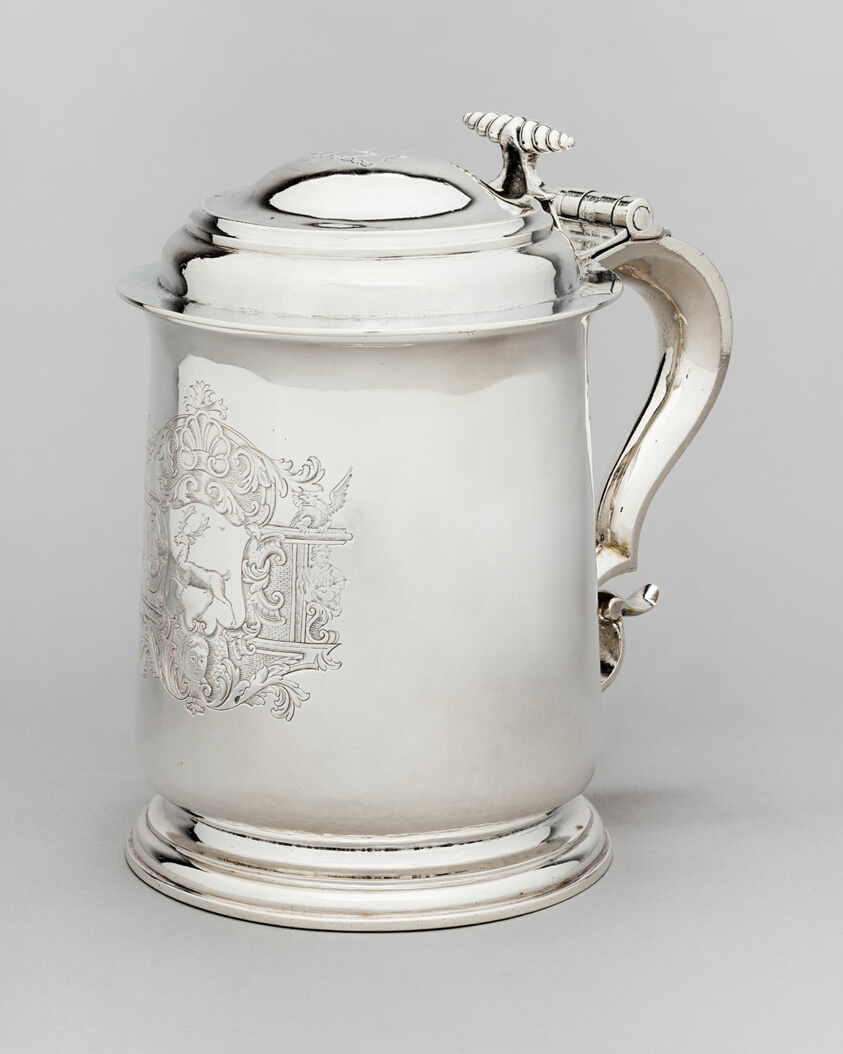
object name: Metalwork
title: Tankard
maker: Simeon Soumaine; American, c.1685–c.1750; New York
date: 1720–45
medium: Silver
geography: New York City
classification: silver; american decorative arts; american arts; decorative arts